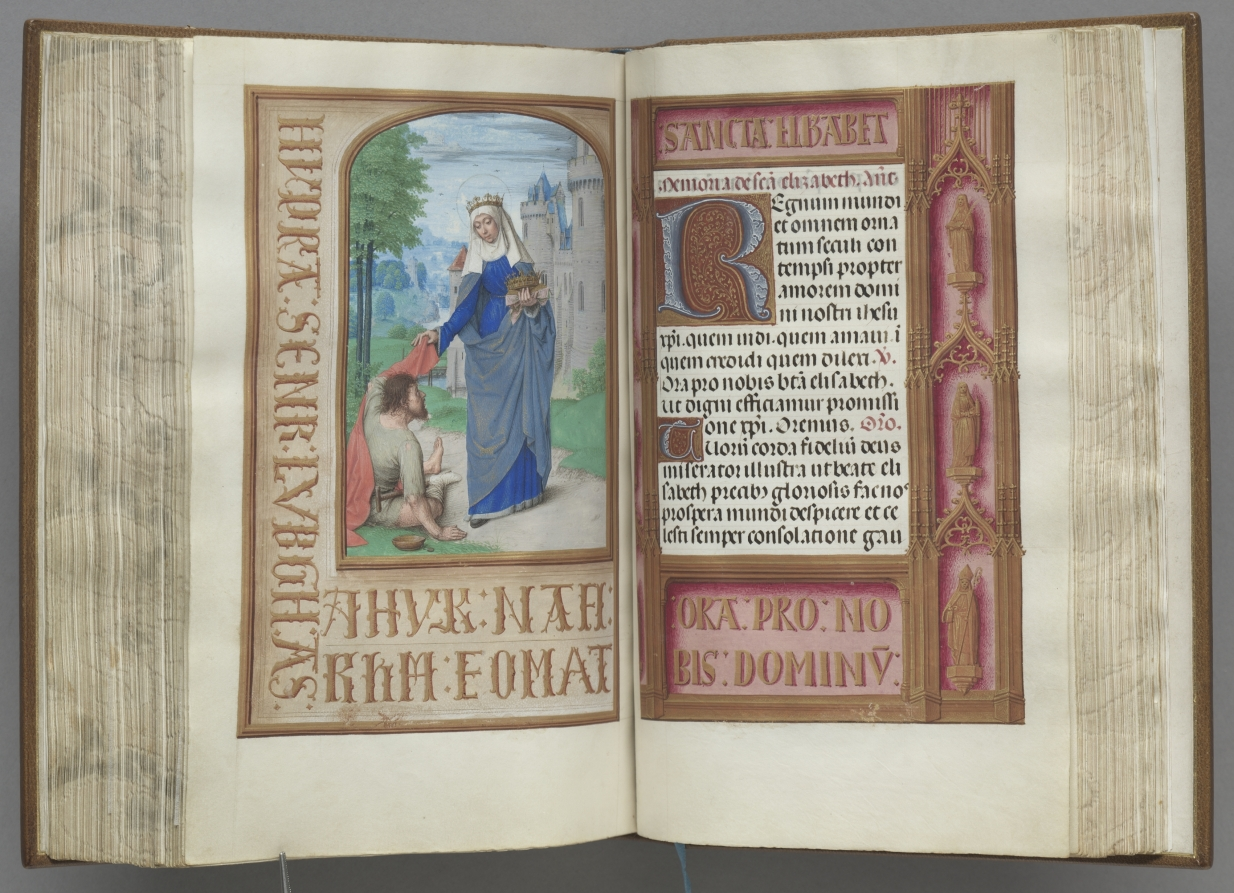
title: Hours of Queen Isabella the Catholic, Queen of Spain: Fol. 198r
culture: Flanders, Ghent and Bruges, late 15th century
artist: Master of the First Prayerbook of Maximillian (Flemish, c. 1444–1519)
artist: and Associates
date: c. 1500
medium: ink, tempera, and gold on vellum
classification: Bound Volume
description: This manuscript was illuminated by a circle of at least five highly organized manuscript painters active in the Flemish cities of Ghent and Bruges. The principal illuminator was Alexander Bening, who painted the majority of the book's miniatures. Manuscripts produced by this circle of artists are renowned for the decoration of their borders, which typically feature a rich variety of realistically-painted flowers, birds, and butterflies. This prayer book, called a book of hours, was intended not for a cleric, but for the private devotions of a lay person-in this case, Isabella the Catholic, Queen of Spain (1451-1504). Isabella's coat of arms embellishes the book's frontispiece. It is unlikely that the book was commissioned by the Queen herself; rather, she probably received it as a diplomatic gift from someone courting her patronage, perhaps Cardinal Francisco Jimenez de Cisneros. A Franciscan friar, Jimenez was dependent upon Isabella for his advancement, first to the post of Queen's confessor in 1492, and then to Archbishop of Toledo in 1495.